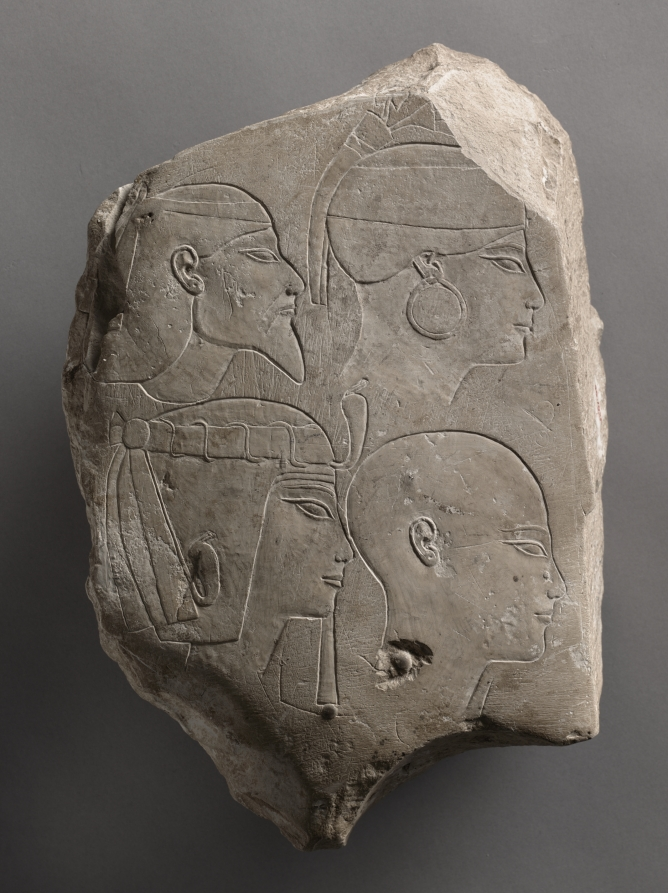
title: Trial Piece Worked on Both Sides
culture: Egypt, probably Thebes, New Kingdom (1540–1069 BCE), Dynasty 18, reign of Amenhotep III (1390–1352 BCE)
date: c. 1391–1353 BCE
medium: limestone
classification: Sculpture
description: This carved flake of limestone provides a fascinating glimpse of the ancient artist at work. One side, by far the better, features four studies of heads. At the upper left is an Asiatic. He has a low forehead, a prominent nose, and a long, pointed beard. To his right is a Nubian wearing the short, round headdress and large loop earring that the Egyptians usually identified with this ethnic group. The bottom row presents images from within Egypt. At the left is a stock image of a king. To his right is another Egyptian, whose clean-shaven head immediately identifies him as a priest. The rather routine, basic subjects of the other side show a far lower level of accomplishment. The sole details of any skill are the incomplete head of the god Bes at the bottom center and the human ear at the left edge. The simple neb-signs (baskets) are poorly executed, and the drawing of the hand is embarrassingly bad. At the lower right is a thickly banded human eye. Above that is the fair head of a princess wearing a short wig, wide headband, and thick sidelock. At the upper left are the beginnings (or the remains) of the bewigged head of a courtier, the face mostly obliterated.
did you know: Trial pieces were a necessity of this busy building period because new styles were continually introduced and rapid training of apprentices was needed.